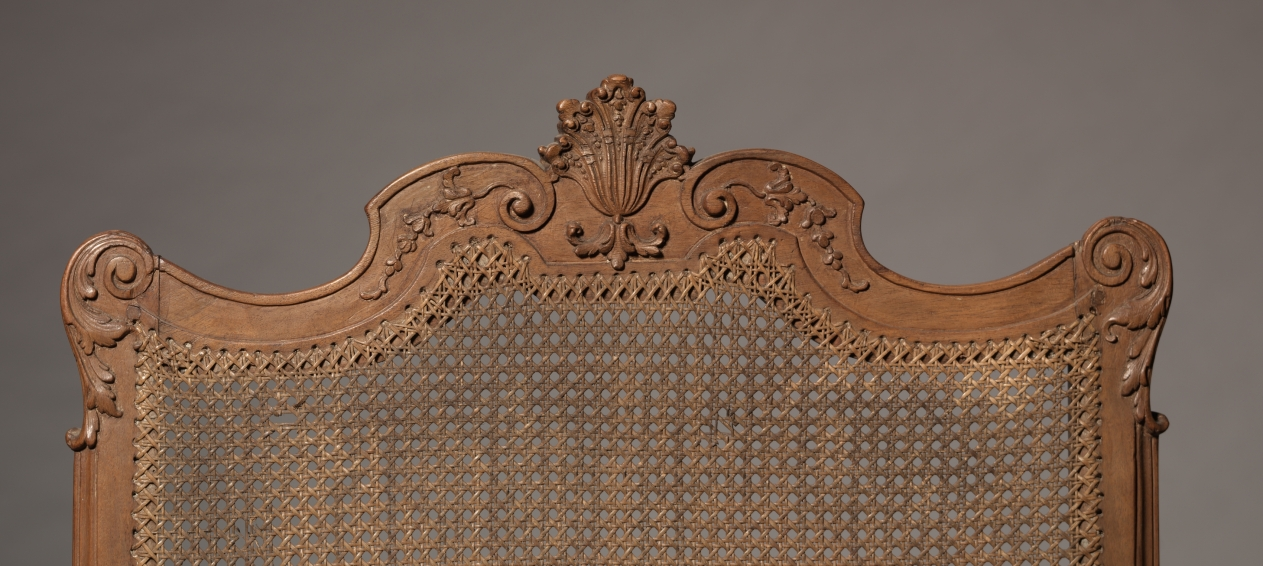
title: Armchair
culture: France, Regence Style, 18th Century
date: 1715–1730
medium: walnut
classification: Furniture and woodwork